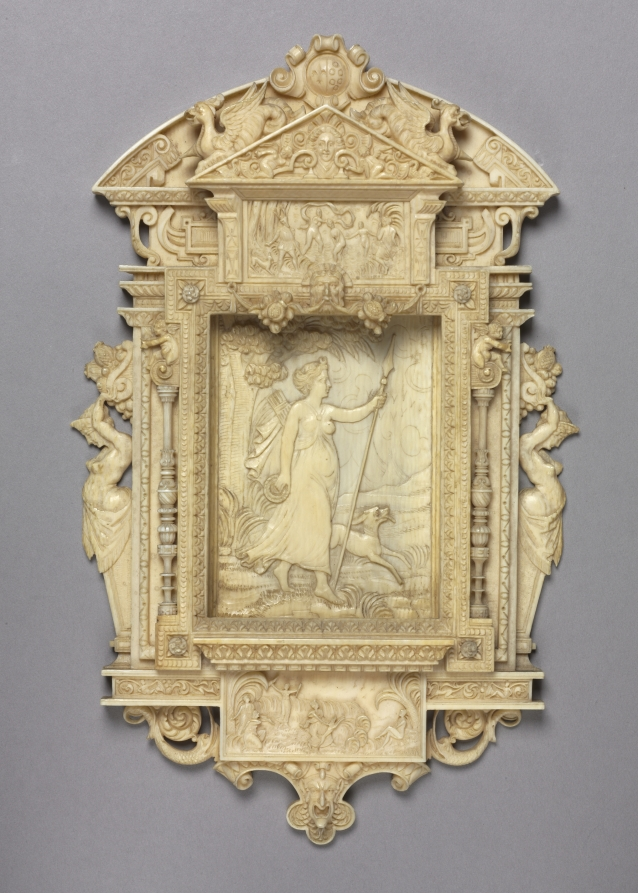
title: Framed Relief of Diana the Huntress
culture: France(?)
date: c. 1850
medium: ivory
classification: Sculpture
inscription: reverse: above is inscribed a poem in French.